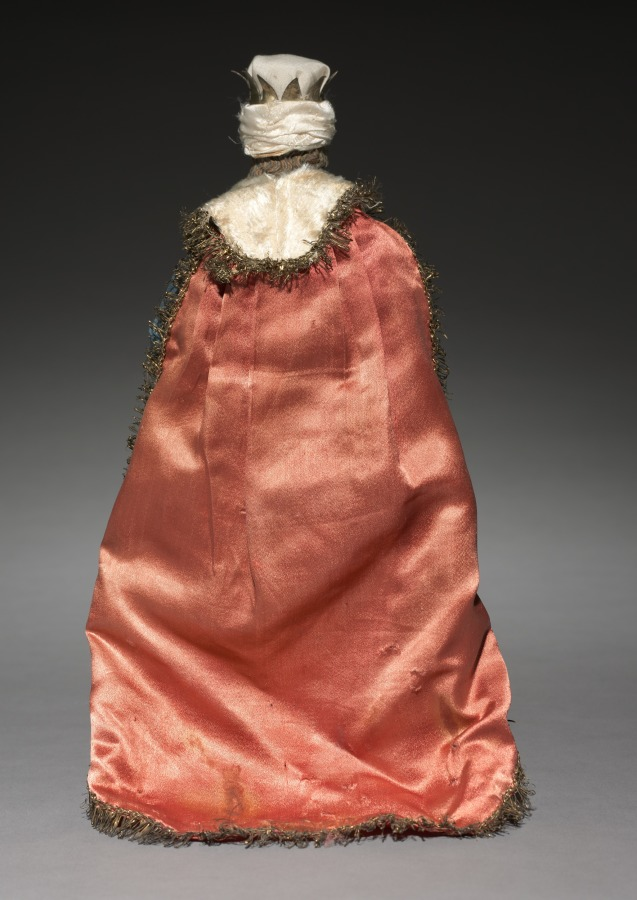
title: Figure from a Crèche: Magus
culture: Italy, Naples, late 18th-early 19th century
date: 1780–1830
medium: painted wood and terracotta with various textiles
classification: Sculpture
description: The practice of creating scenes of the Nativity for the home dates from the early 1700s in Italy, where people began to set up doll-like figures of about a foot or less in height. The custom was particularly popular in Naples around 1800, where crèche scenes (crèche means cradle, or crib) included many figures, whose heads and hands of painted terracotta, stuffed cloth bodies, and clothing adapted from contemporary local costumes gave them an amazingly realistic character. Representations of the birth of Jesus can be traced to the first few centuries of Christianity. Both living creatures and sculptural depictions of them were used from early times. By the late middle ages it was customary to create life-size figures of wood or stone, naturalistically painted, to represent the characters who participated in the events of Jesus's early life. These sculptures were then arranged in scenes illustrating one or both of the most important of these events, the Adoration of the Shepherds and the Adoration of the Magi-the three kings from the East who came to pay homage to the Christ child. Used in churches, these large figures were especially popular in Italy, Central Europe, Spain, and Portugal. This Object in Focus presentation was organized by Henry Hawley, Curator of Renaissance and Later Decorative Arts and Sculpture.